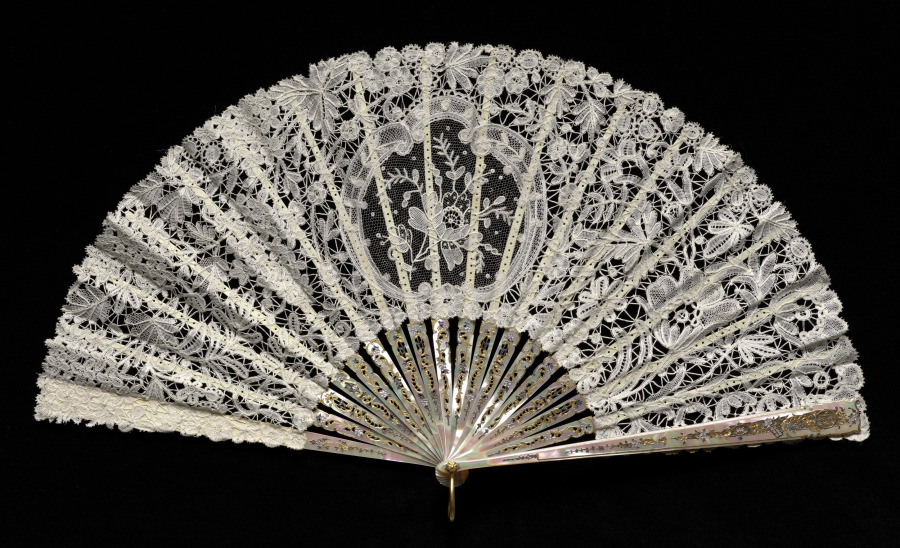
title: Lace Fan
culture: Belgium; Brussels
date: 1800s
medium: Linen: needle lace and bobbin lace (Point Duchesse)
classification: Lace